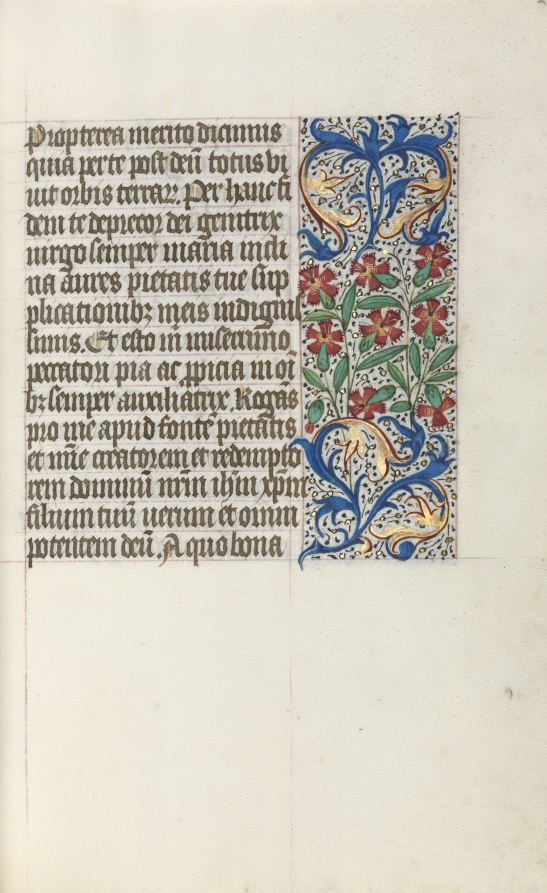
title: Book of Hours (Use of Rouen): fol. 24r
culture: France, Rouen, 15th century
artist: Master of the Geneva Latini (French, active Rouen, 1460–80)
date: c. 1470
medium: ink, tempera, and gold on vellum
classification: Bound Volume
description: In the late 1400s and early 1500s Rouen was an established and important center of book production. The city’s cathedral had a wealthy chapter that spent large sums of money to commission books and to maintain its extensive library. The stationers and booksellers would have likely been concentrated in or near the cathedral precinct. This artist, named after a manuscript now in Geneva, was Rouen’s principal illuminator during the second half of the 1400s.